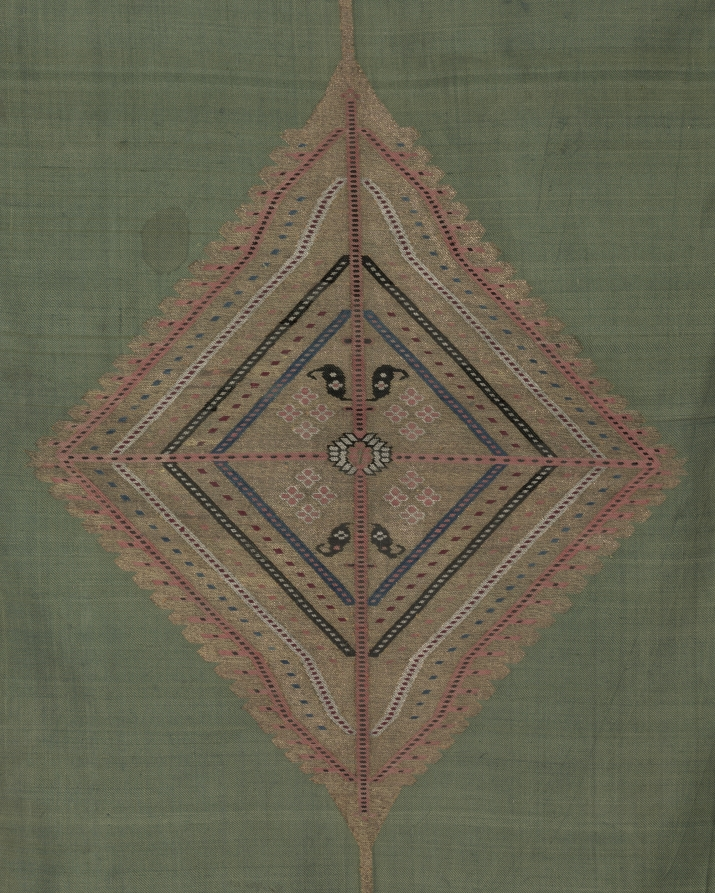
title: Scarf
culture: Iran, 19th century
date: 1800s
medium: twill and tabby weaves, brocaded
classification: Textile